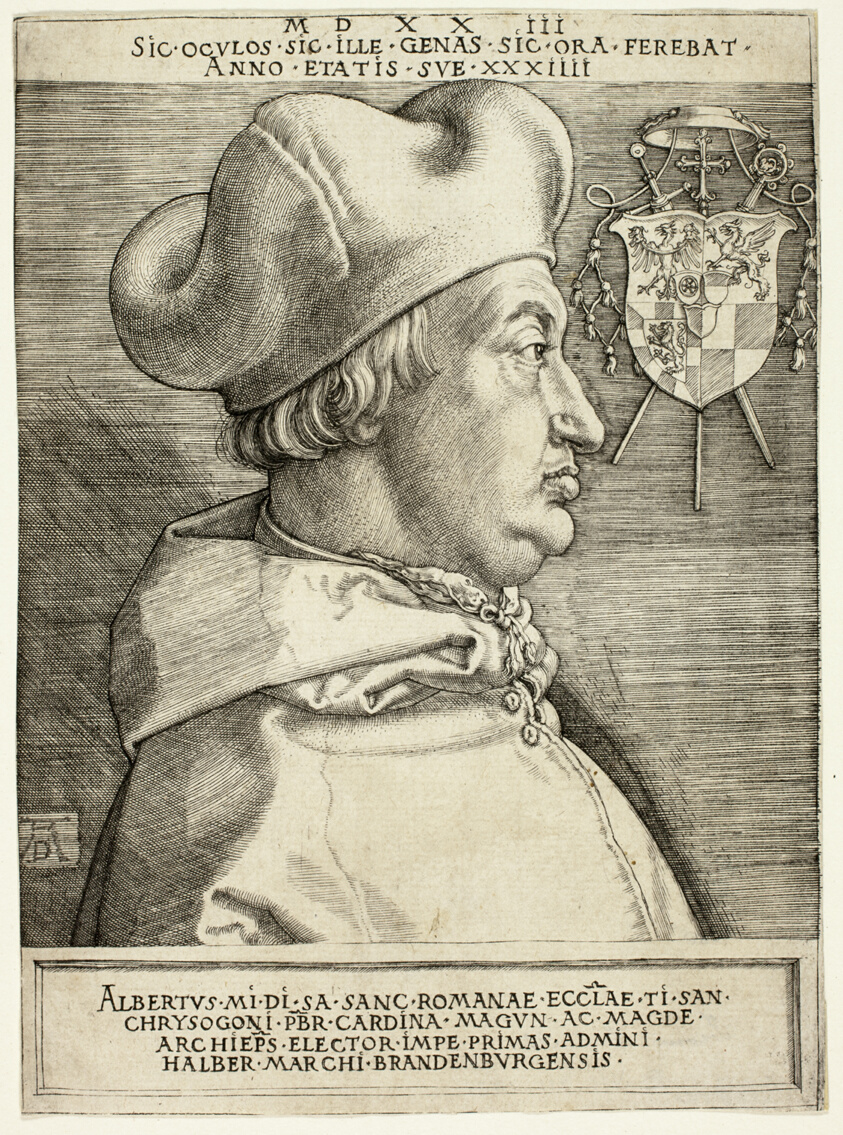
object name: Print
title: Cardinal Albrecht of Brandenburg (The Great Cardinal)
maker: Albrecht Dürer (German, 1471-1528)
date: 1523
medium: Engraving in black on ivory laid paper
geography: Germany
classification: engraving; print; prints and drawing; paper